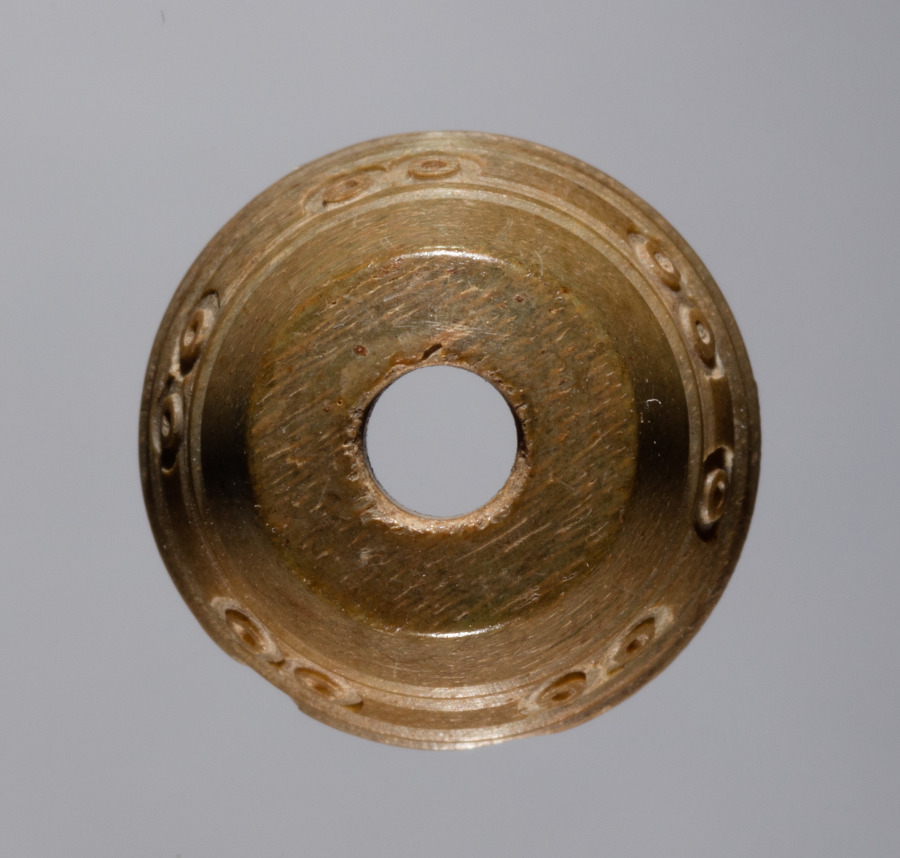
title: Spindle Whorl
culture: Iran, early Islamic period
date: 700s - 900s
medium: bone, incised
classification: Spindle Whorl